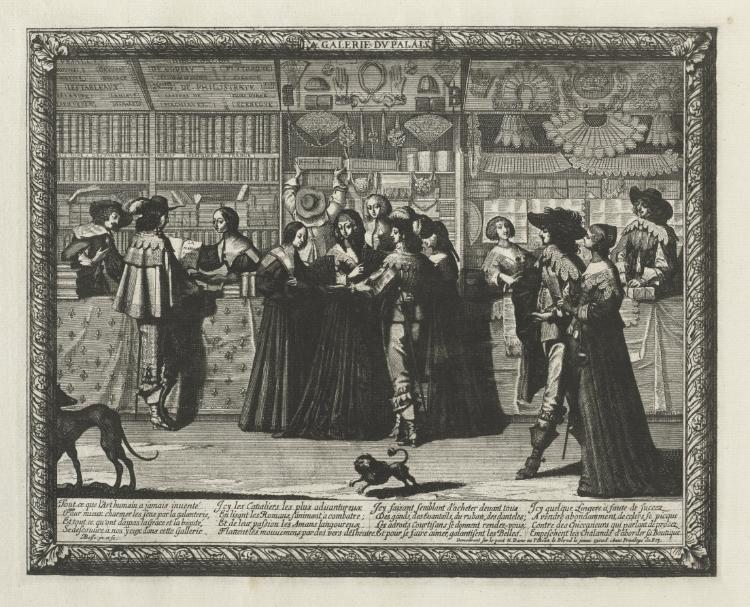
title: La Galerie du Paris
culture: France, 17th century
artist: Abraham Bosse (French, 1602–1676)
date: 1640(?)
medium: etching and engraving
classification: Print